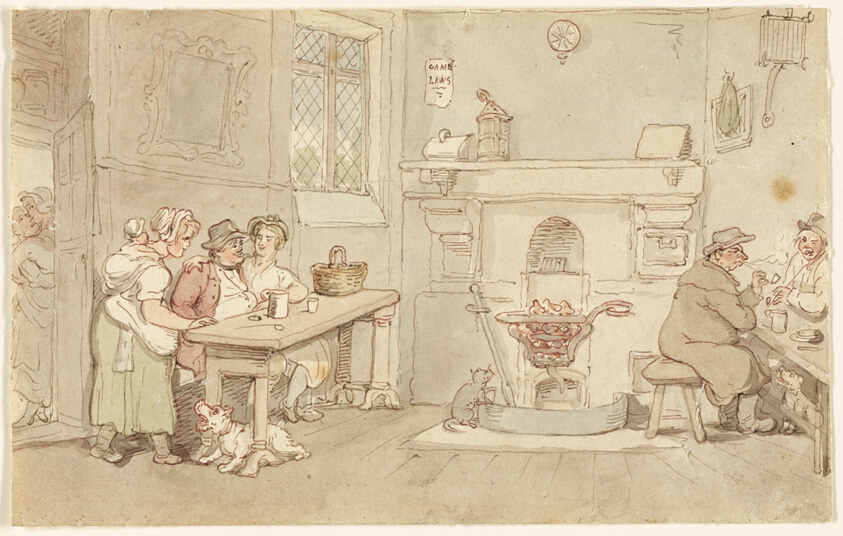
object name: Drawing and Watercolor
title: Ale House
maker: Thomas Rowlandson (English, 1756-1827)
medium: Pen and red and brown ink with brush and watercolor, on ivory wove paper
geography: England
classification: watercolor; drawings (visual works); prints and drawing